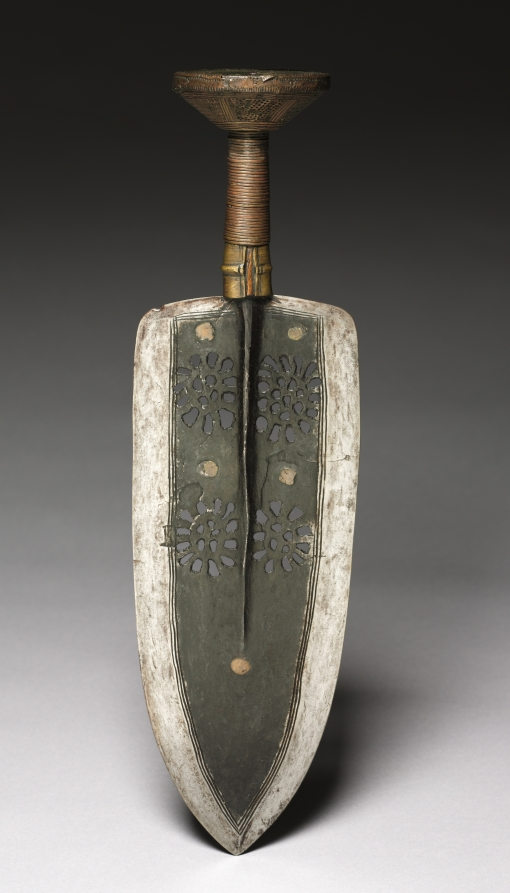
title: Dagger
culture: Africa, Central Africa, Democratic Republic of Congo, 19th century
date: 1800s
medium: Iron, wood, and copper alloy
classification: Arms and Armor